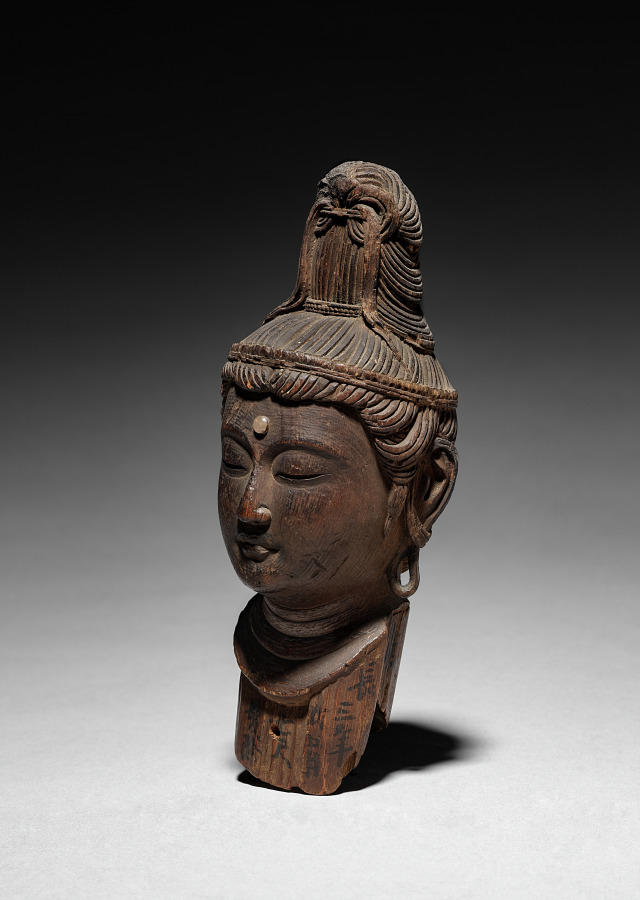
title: Head of Kannon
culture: Japan, Edo period (1615–1868)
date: late 1600s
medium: wood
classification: Sculpture